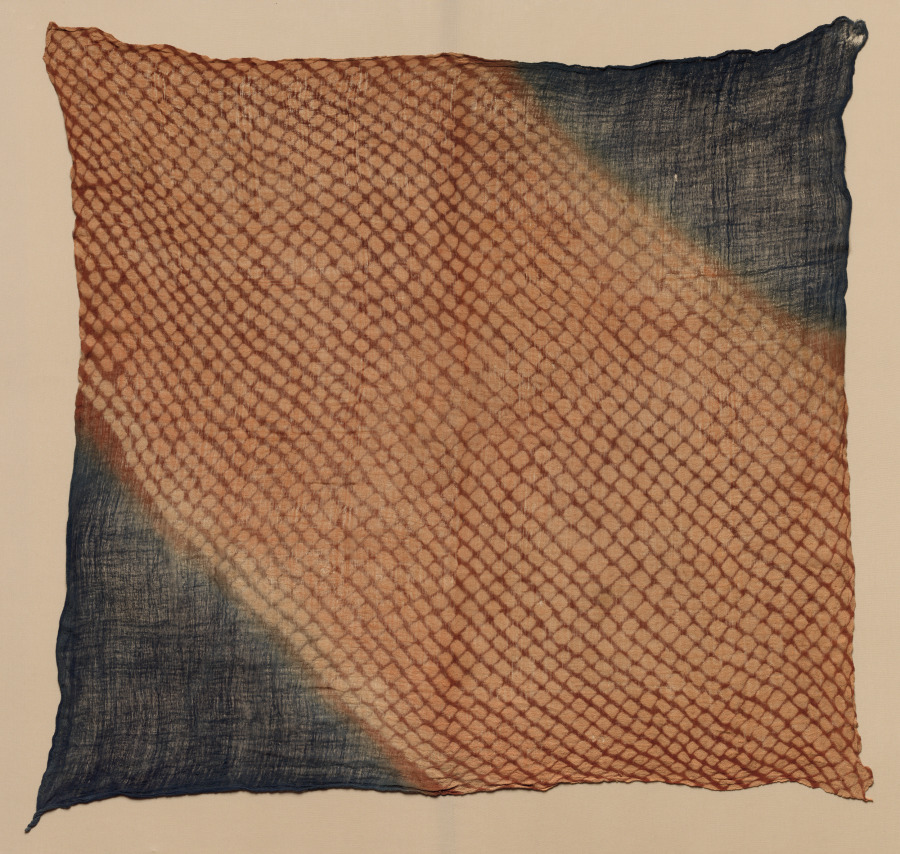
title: Head Cloth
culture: Central Andes, central coast, Chancay people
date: 1000–1460s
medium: Cotton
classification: Textile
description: This tie-dyed panel was probably worn as a head cloth, a common article of women’s wear among the Chancay people of Peru’s central coast. Its colors are reminiscent of a deep twilight, when the sky turns a luminous, dark blue and a shimmer of orange light appears on the horizon. It is not known whether the repeated squares have symbolic significance.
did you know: It is unknown whether Chancay head cloths were part of larger clothing ensembles.